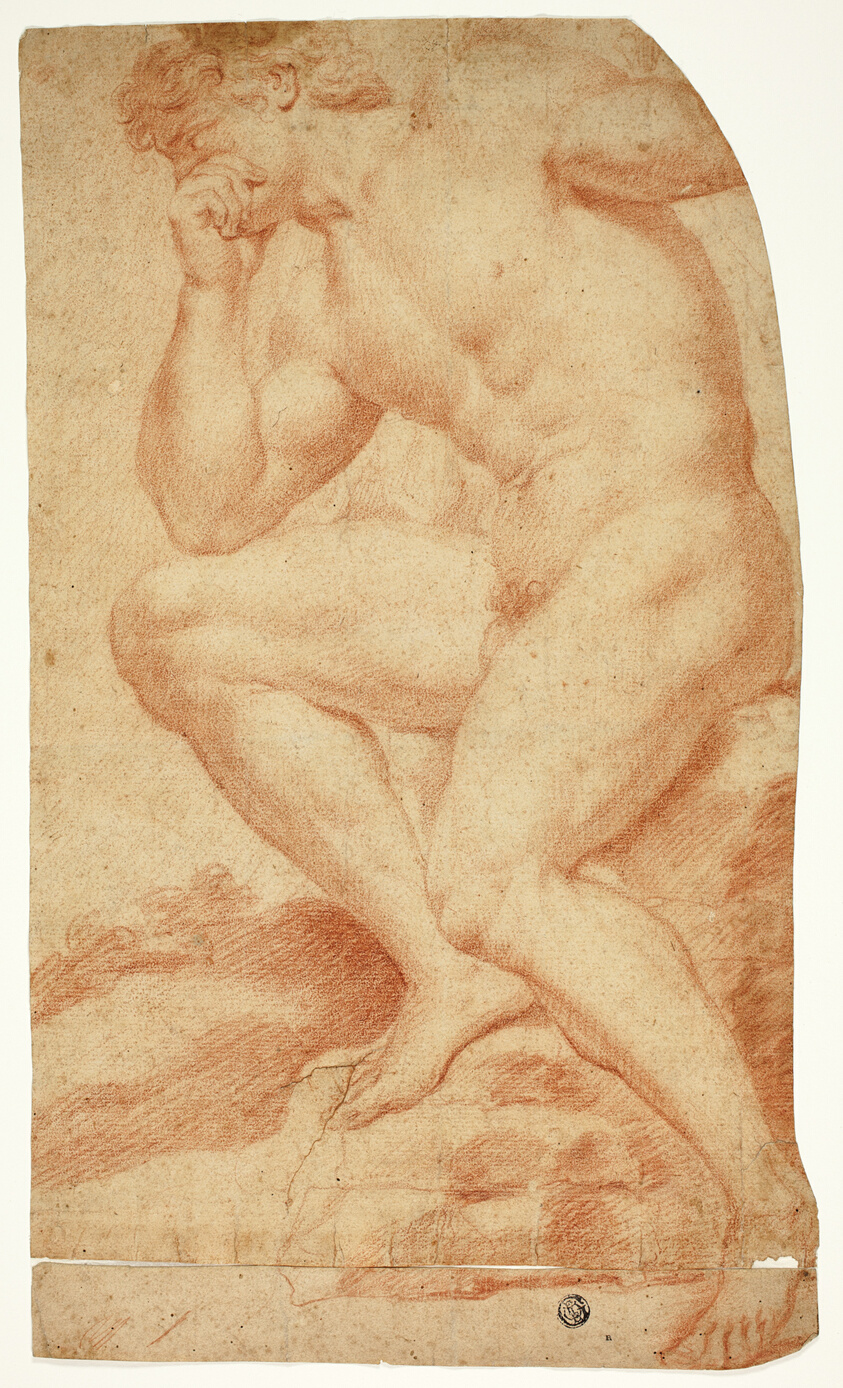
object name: Drawing and Watercolor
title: Seated Academic Male Nude in Profile to Left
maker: Attributed to Andrea Camassei; Italian, 1602-1649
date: 17th century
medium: Red chalk on cream laid paper, pieced and laid down on ivory laid paper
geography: Italy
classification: chalk; drawings (visual works); prints and drawing